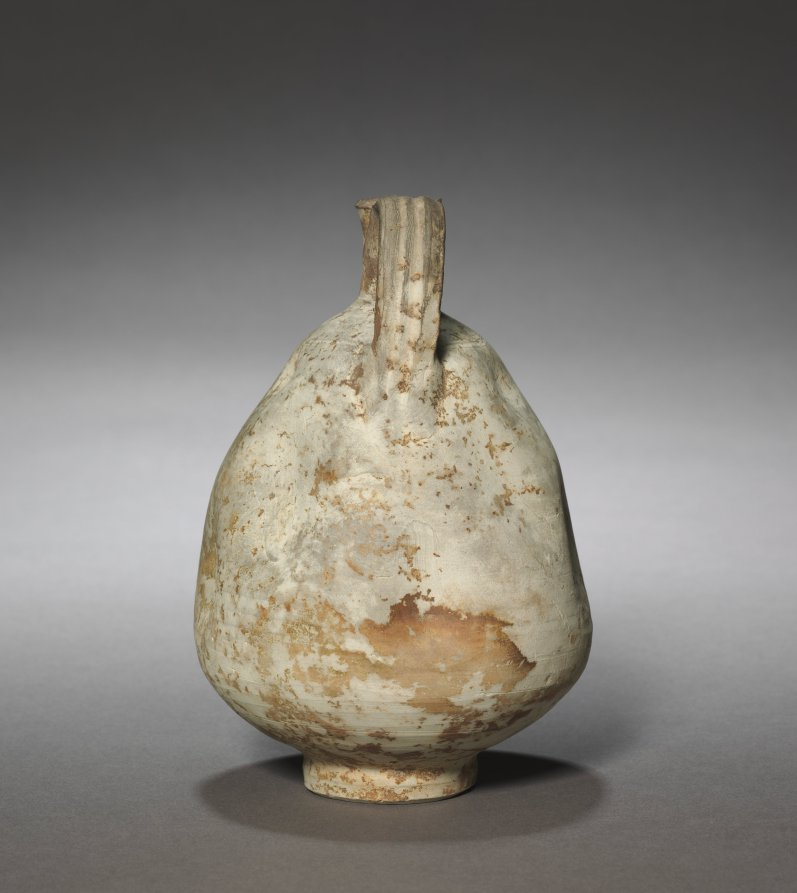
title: Jug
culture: Iran or Iraq, Seljuq period (1037–1194)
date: 1100s–1200s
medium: earthenware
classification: Ceramic